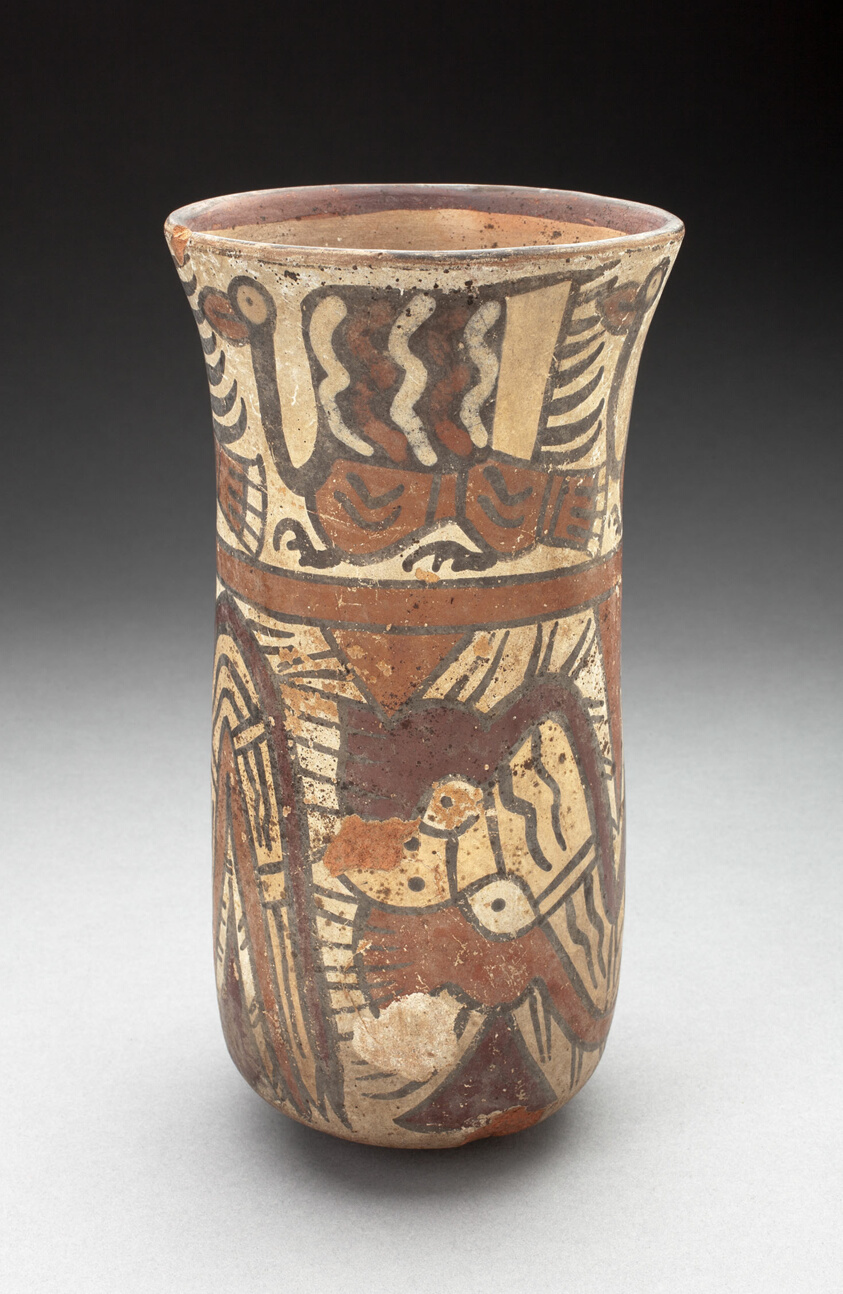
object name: Vessel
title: Beaker Depicting Abstract Birds, Serpents, and other Figures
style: nazca, early intermediate period, Pre-Columbian, americas, Arts of the Americas, andean, andes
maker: Nazca; South coast, Peru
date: 180 BCE–500 CE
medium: Ceramic and pigment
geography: Nazca Valley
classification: earthenware; art of the americas; ceramics; vessel